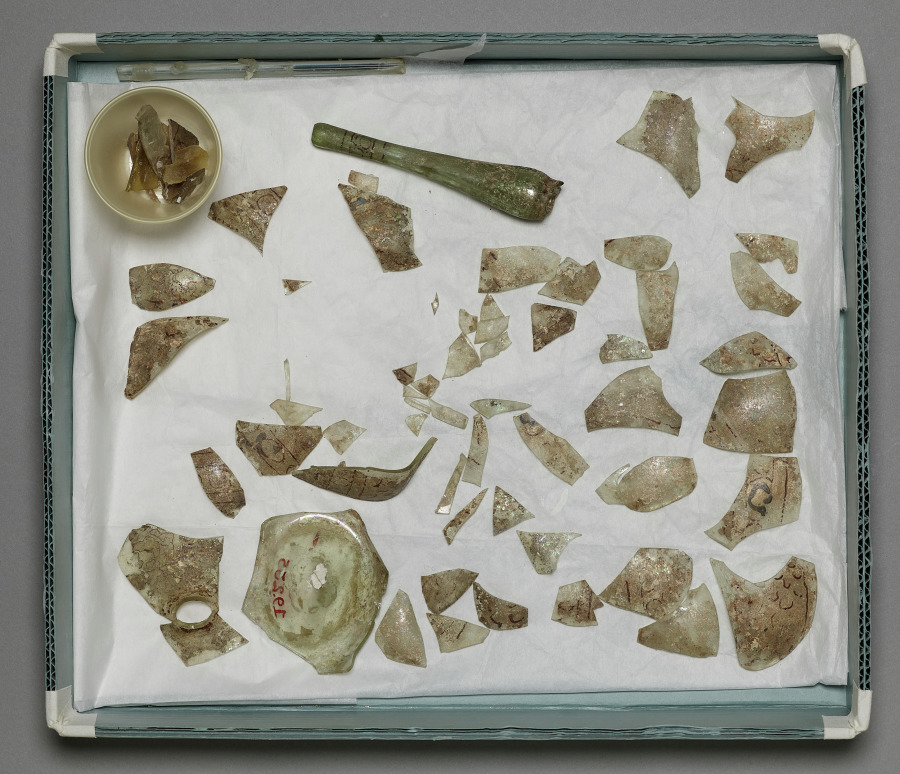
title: Flask or Sprinkler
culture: Syria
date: 1200s–1300s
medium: glass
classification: Jewelry